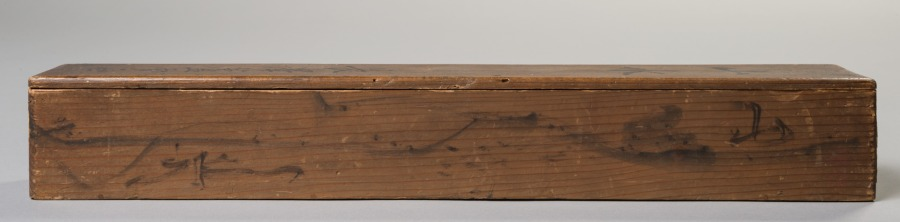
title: Mountains and Distant Boats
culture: Japan, Edo period (1615–1868)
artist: Nagasawa Rosetsu (Japanese, 1754–1799)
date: late 1700s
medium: hanging scroll; ink and slight color on paper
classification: Painting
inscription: Signed: 蘆雪; Sealed: 引裾